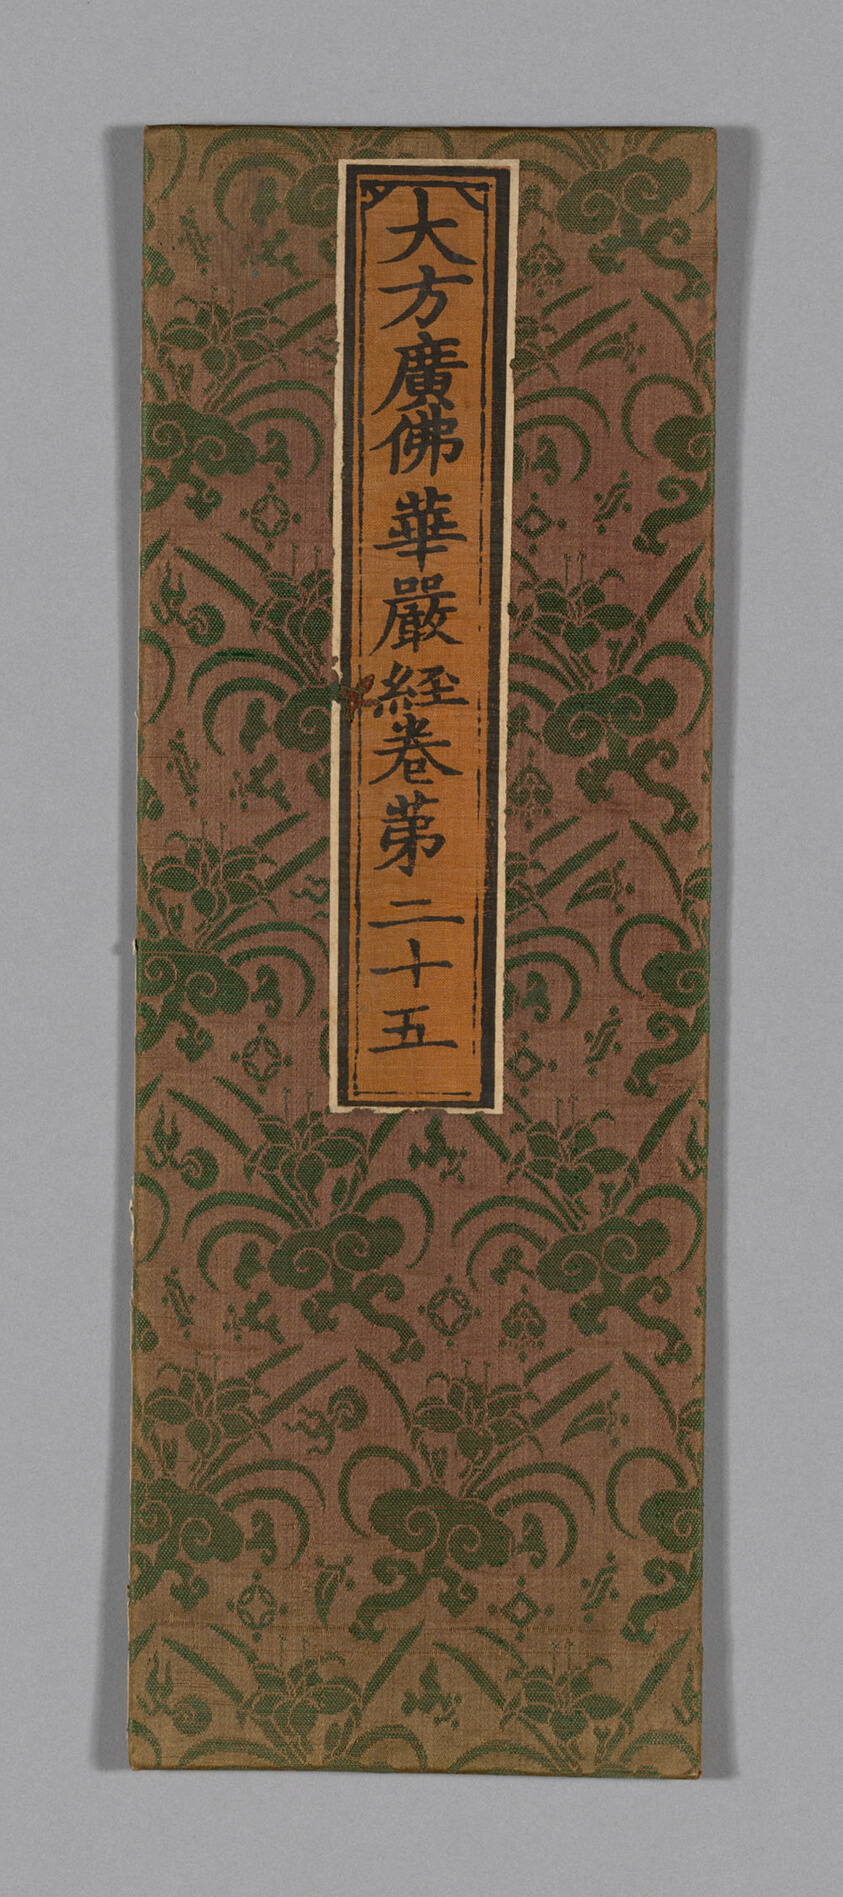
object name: Textile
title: Sutra Cover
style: ming, Chinese (culture or style), East Asian, asian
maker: China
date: Ming dynasty (1368–1644), c. 1590's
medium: Silk, warp-float faced 4:1 satin weave with supplementary patterning wefts bound in weft-float faced 1:4 satin interlacings; label: silk, plain weave; painted with ink; mounted over paper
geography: China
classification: textile; weaving